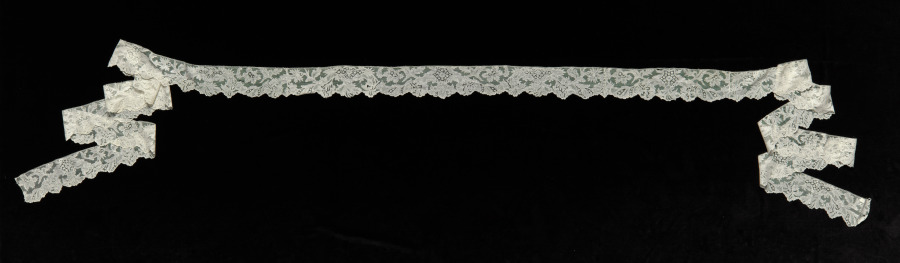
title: Lace Edging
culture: Italy, Venice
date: 1700–1740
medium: Needle lace (Grounded Venetian Point)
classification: Lace